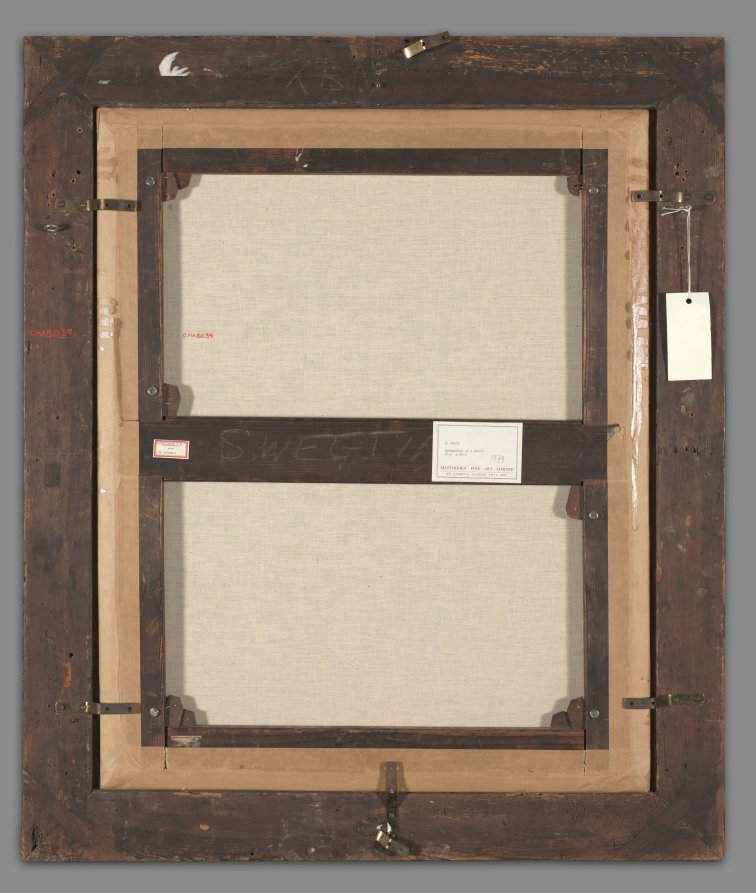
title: Study for "An Apotheosis of a Saint" (for San Bernardino dei Morti, Milan)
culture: Italy, 17th century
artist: Sebastiano Ricci (Italian, 1659–1734)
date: c. 1695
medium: oil on canvas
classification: Painting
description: This sketch represents an apotheosis, or a rise to heaven, of a saint. However, the precise identity of the figure remains unknown, since documents describing the commission have not yet been discovered, and the military costume does not sufficiently distinguish him.